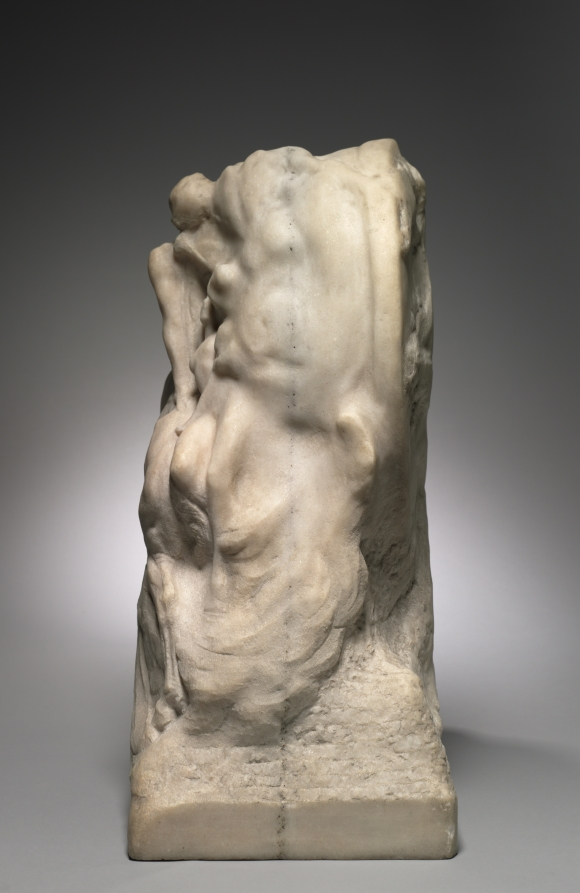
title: Dawn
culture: America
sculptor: Chester Beach (American, 1881–1956)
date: 1912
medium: marble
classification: Sculpture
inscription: Signed on side: CB (monogram) Roma 1912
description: Created while Chester Beach was living in Rome, Dawn features a nude man on horseback against a background of human forms emerging from a cloud of rolling mist. Although carved in the round from a block of marble, the sculpture has one primary view.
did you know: Chester Beach traded two of his sculptures to a farmer in Brewster, NY, obtaining land where he built his studio and a summer home.